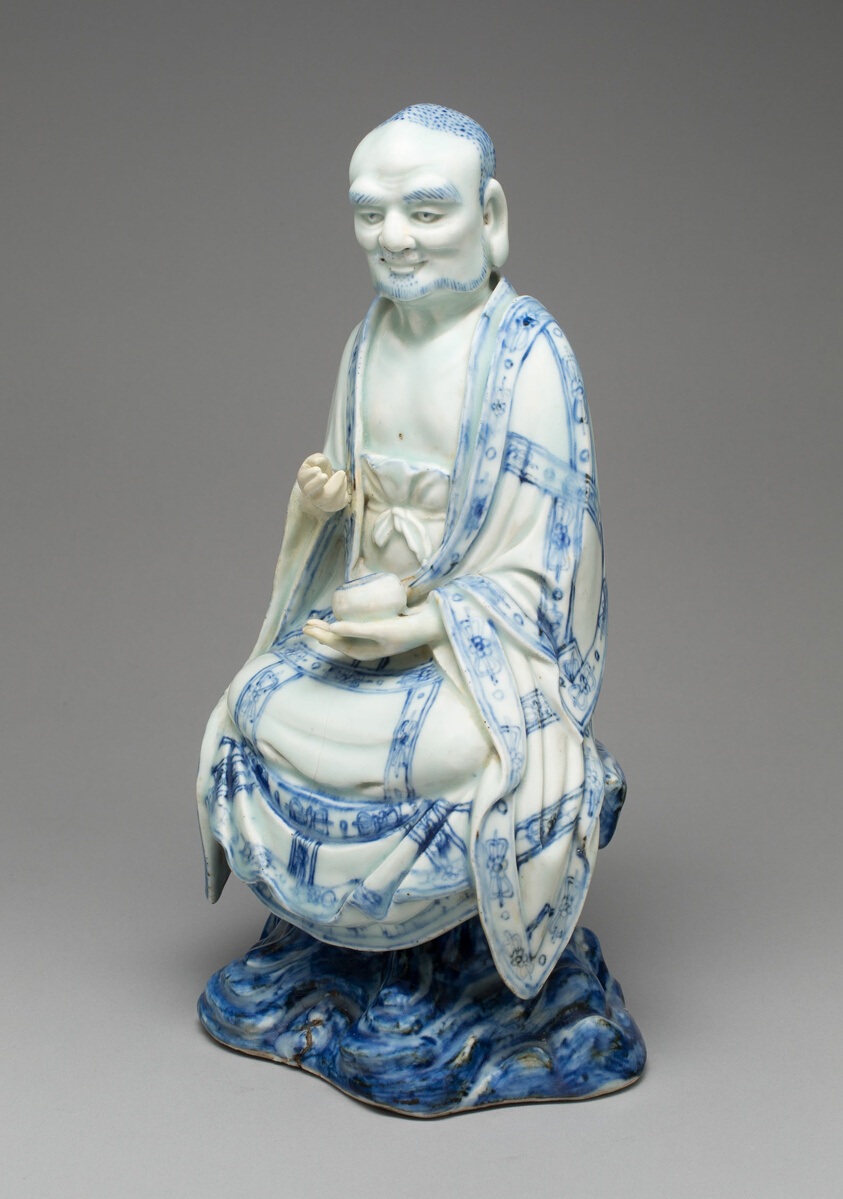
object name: Sculpture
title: Figure of a Luohan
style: Chinese (culture or style)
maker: China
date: Ming dynasty (1368–1644) or Qing dynasty (1644–1911), c. 17th century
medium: Porcelain painted in underglaze blue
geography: China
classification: porcelain; asian art; ceramics; sculpture